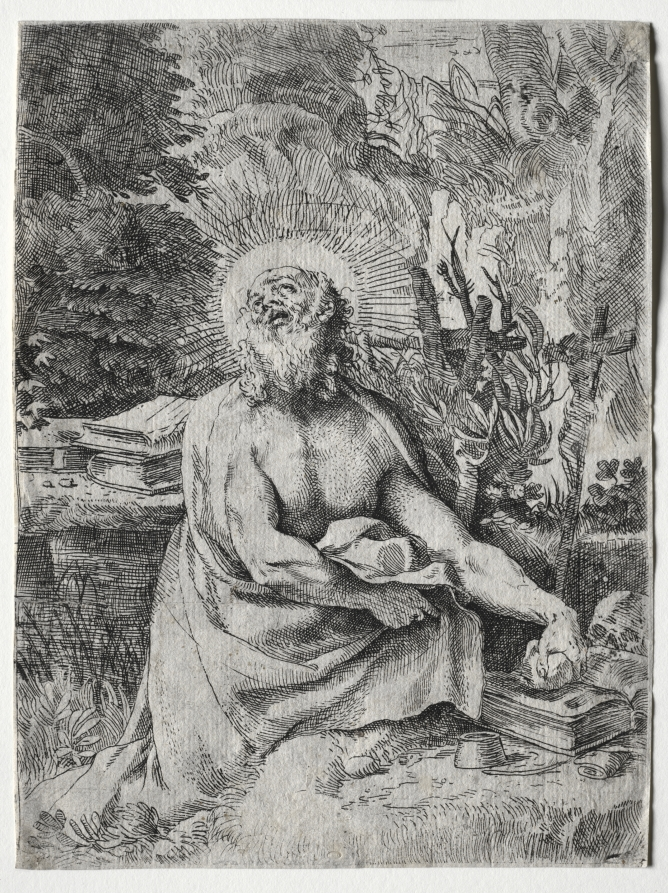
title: St. Jerome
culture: Italy, 16th century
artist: Annibale Carracci (Italian, c. 1560–1609)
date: c. 1591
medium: etching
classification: Print